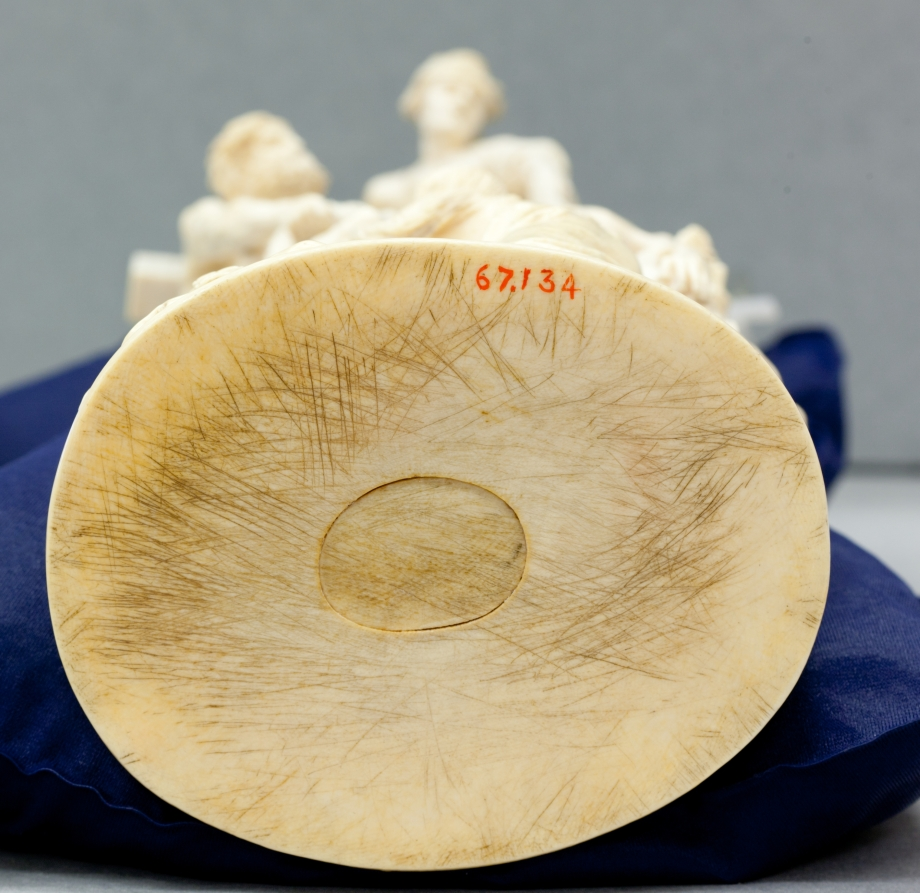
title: Descent from the Cross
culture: Austria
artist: Adam Lenckhardt (German, 1610–1661)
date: 1653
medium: ivory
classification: Sculpture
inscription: inscribed with monogram "AL" conjoined and dated 1653.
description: Carved from a single piece of ivory for Prince Karl Eusebius von Liechtenstein of Vienna, this work is a true tour-de-force. It took Lenckhardt seven years to complete; it is his last known sculpture and the pinnacle of his career. The biblical accounts of the descent from the cross found in the gospels are not consistent, which may contribute to the difficulty in precisely identifying the figures. The Virgin Mary, Saint John, Mary Magdalene, and others were said to be present, but undoubtedly there are other disciples here mourning Christ’s death. The intense emotion registers on the faces of the figures in the scrupulous and exquisitely detailed work.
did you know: Carved from a single elephant tusk, the artist took special care to ensure the ivory did not crack or break as he meticulously crafted each figure in this visually exciting sculpture. Look closely to find tools and small objects included near its base.